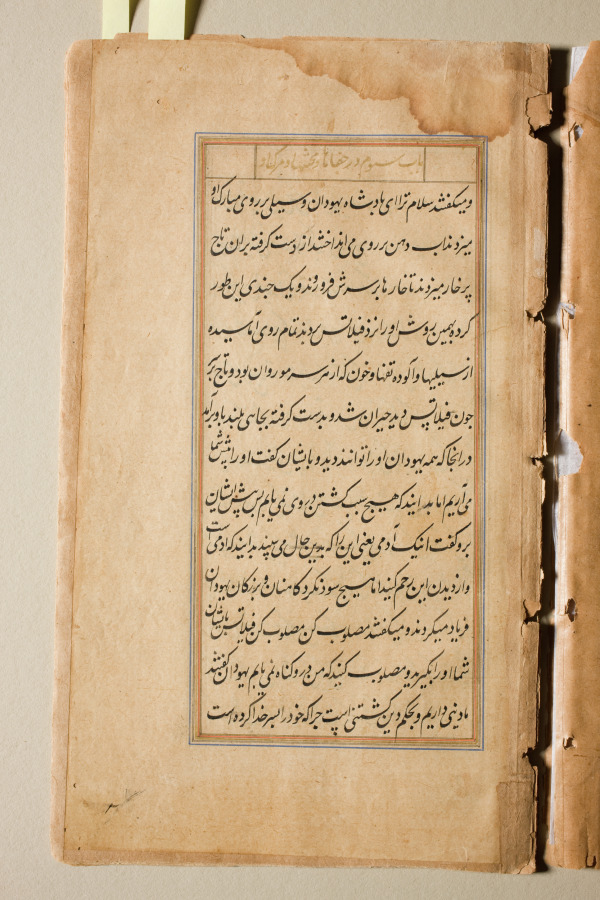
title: Text page from a Mirror of Holiness (Mir’at al-quds) of Father Jerome Xavier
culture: Mughal India, Allahabad, made for Prince Salim (1569–1627)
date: 1602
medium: Ink and gold on paper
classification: Manuscript